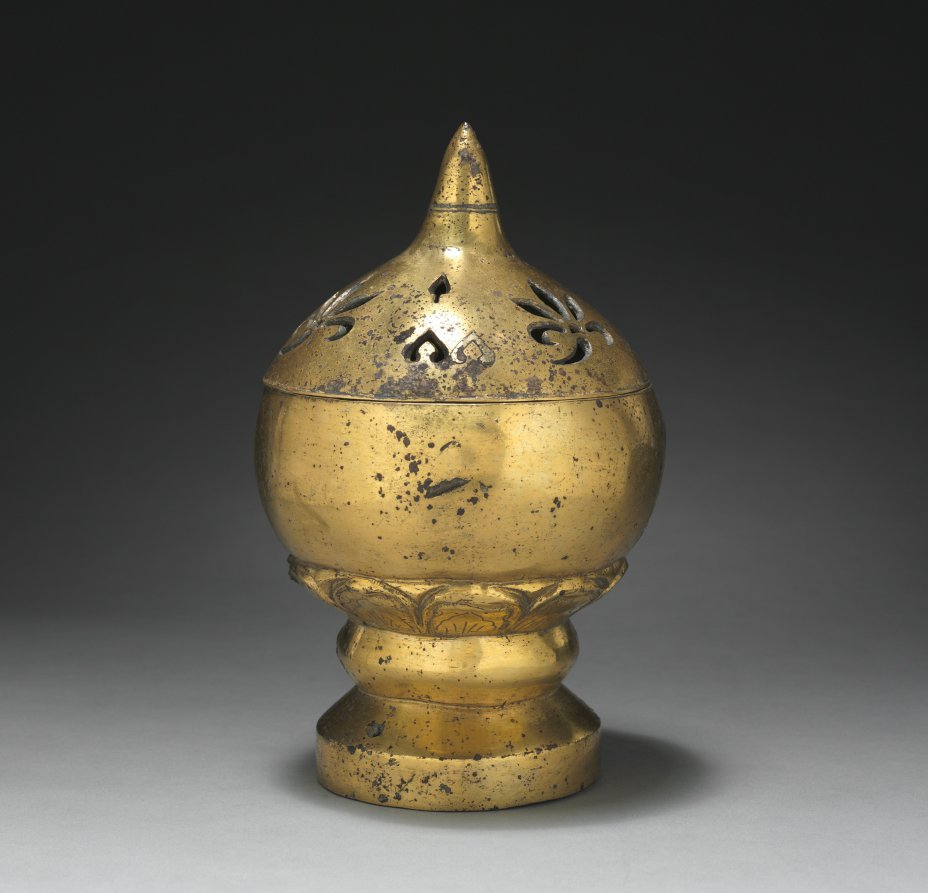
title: Censer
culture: China, Tang dynasty (618–907)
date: early 600s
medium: gilt bronze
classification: Metalwork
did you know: The censor's base has a band of incised lotus-petal motifs, while the pointed lid has openwork floral motifs to release the incense's aroma.